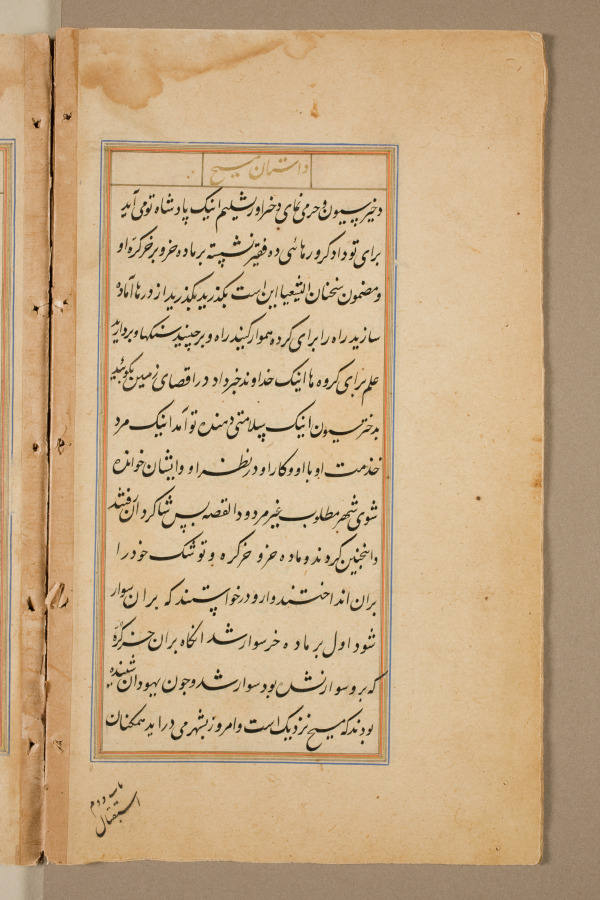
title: Text page from a Mirror of Holiness (Mir’at al-quds) of Father Jerome Xavier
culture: Mughal India, Allahabad, made for Prince Salim (1569–1627)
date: 1602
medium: Ink and gold on paper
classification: Manuscript